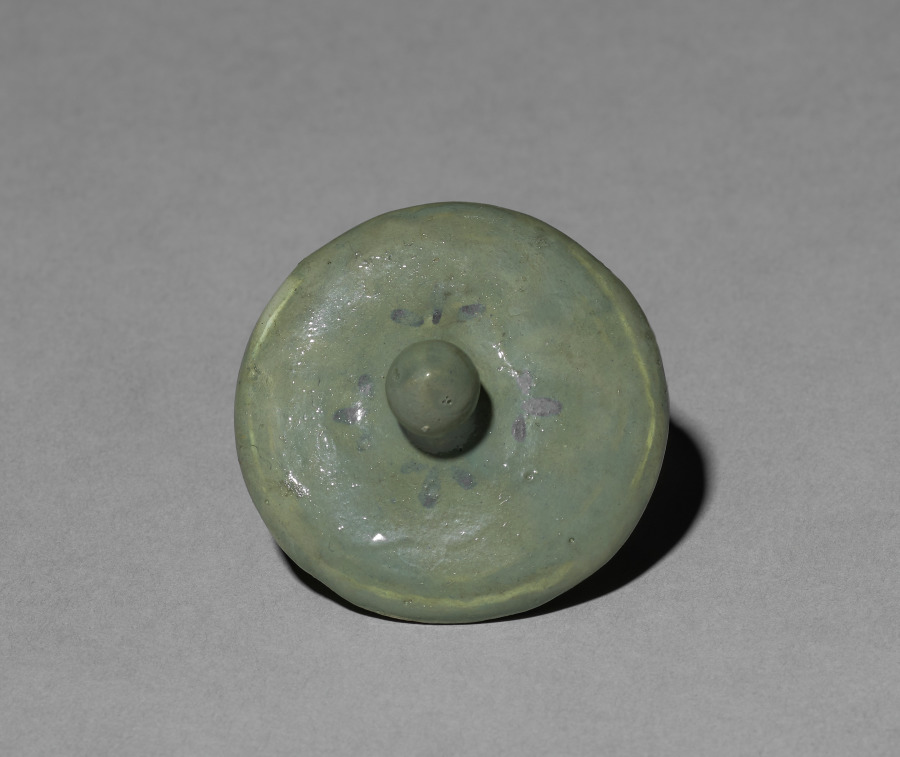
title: Melon-shaped Ewer with Incised Peony Design (lid)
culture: Korea, Goryeo dynasty (918–1392)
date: 918–1392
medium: plaster with acrylic paint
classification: Ceramic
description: This melon-shaped pitcher is adorned with a delicate drawing that renders chrysanthemum buds with full blossoms in white and black inlays. In Korea, chrysanthemum flowers and leaves were made into both tea and wine. Chrysanthemum wine was enjoyed during the the Double Nine Festival (the ninth day of the ninth month in the lunar calendar) when praying for longevity.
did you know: The shape of this pitcher resembles a type of yellow muskmelon cultivated mainly in East Asia.